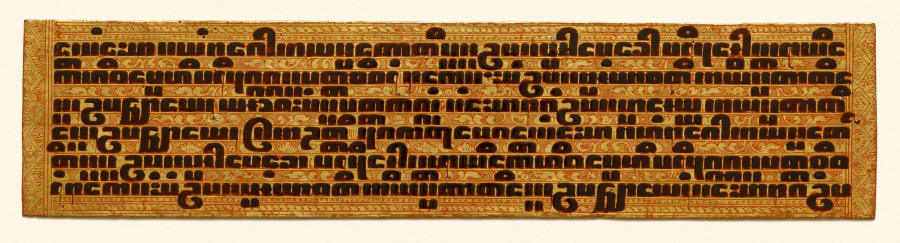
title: Text, folio 3 (recto) from a Kammavacha: Buddhist ordination text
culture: Myanmar (Burma)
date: 1800s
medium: Leaf: lacquer and gilding on cloth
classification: Manuscript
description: In premodern Burma, lay people commissioned lavishly ornamented manuscripts for ceremonial occasions, when officiants would read aloud from the text. Written in black lacquer, the text is in the language of Pali written in a Burmese script. It contains ordination rites and procedures for monastic ceremonies. The second to last page is covered with intricately drawn, winged celestial beings (nats) in gestures of praise. They fly amid intertwining vegetation—denoting bounty—that grows from serpentine forms that refer to rain clouds. Lionlike forms inhabit the space with them. The top and bottom covers are equally ornamented with jeweled floral patterning.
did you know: The Pali text of this manuscript is written in Burmese square script, which is also known as "tamarind seed script."